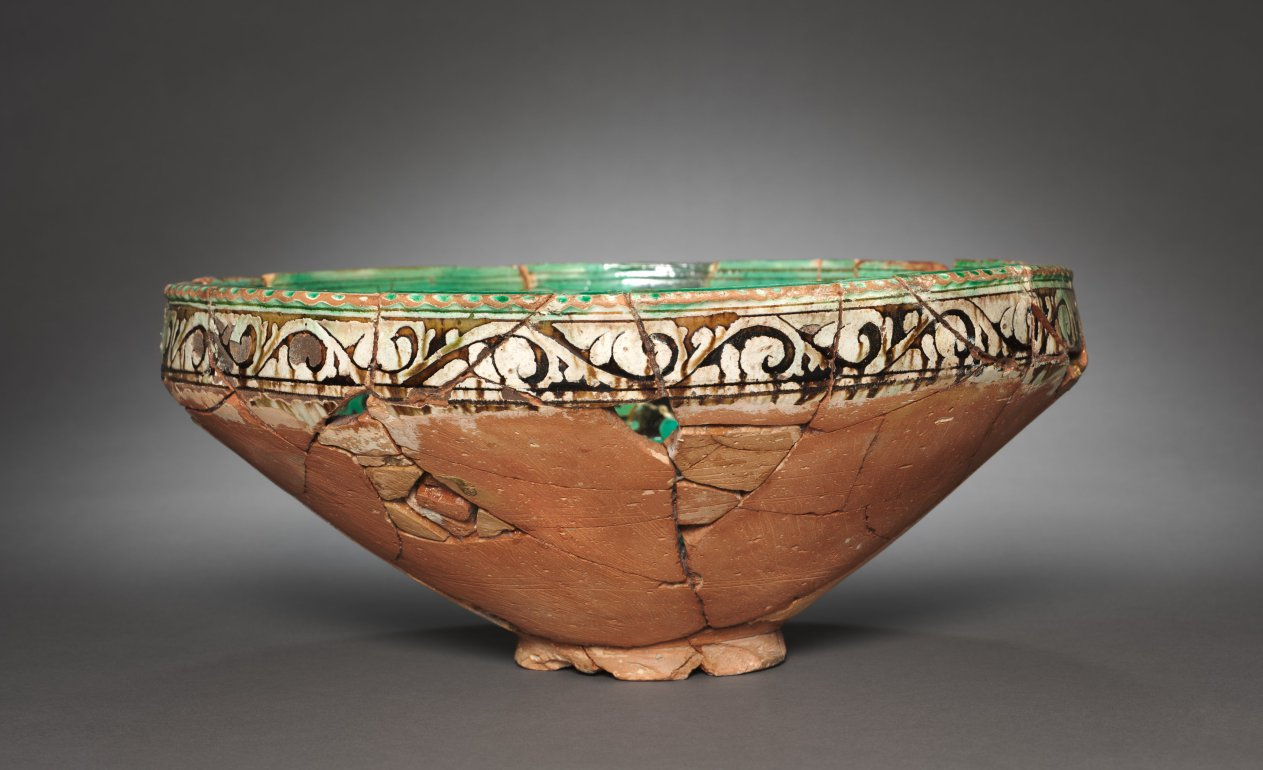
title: Bowl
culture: Northwest Iran, Garrus district, late Saljuq Period, 12th-13th Century with 20th Century replacement fragments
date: 1100s–1200s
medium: earthenware with underglaze slip-painted decoration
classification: Ceramic